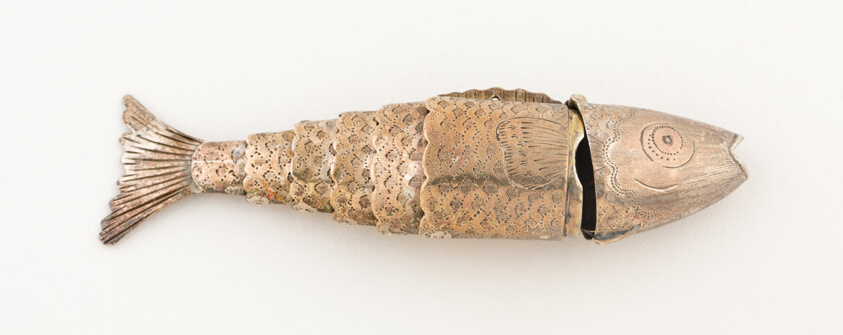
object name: Metalwork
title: Fish-Shaped Vinaigrette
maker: Possibly Joseph Willmore; Birmingham, England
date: c. 1818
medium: Silver and silver gilt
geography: Birmingham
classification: container for personal use; vinaigrette (container for health care); european decorative arts; metalwork; silver; decorative object/ornament